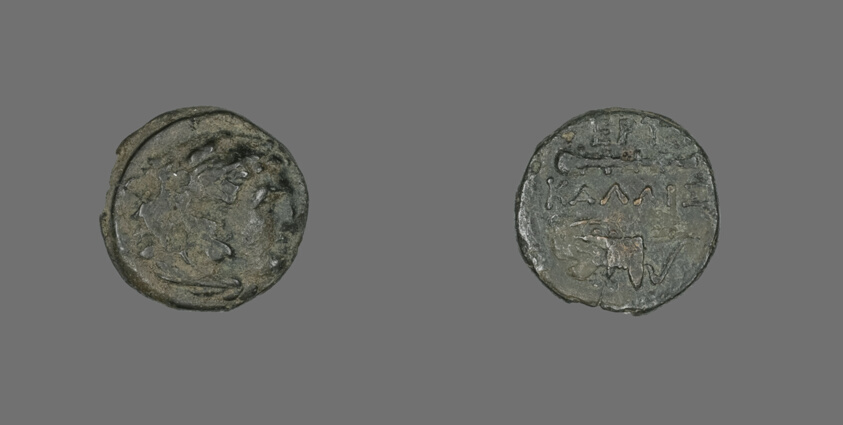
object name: Coin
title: Coin Depicting the Hero Herakles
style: greek, ancient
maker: Greek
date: 4th century BCE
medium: Bronze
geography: Ancient Greece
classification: coin; ancient art